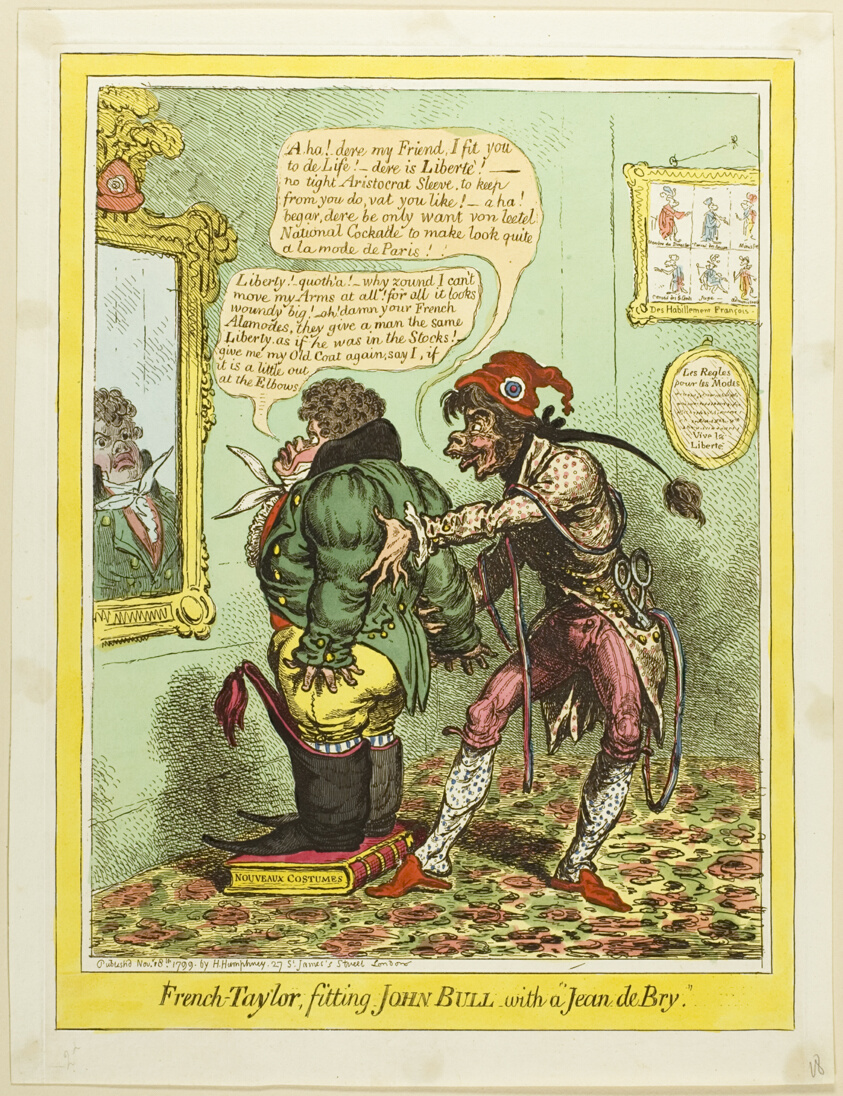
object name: Print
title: French-Tailor, Fitting John Bull with a "Jean de Bry"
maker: James Gillray (English, 1756-1815); published by Hannah Humphrey (English, c. 1745-1818)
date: published November 8, 1799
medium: Hand-colored etching on paper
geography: England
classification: etching; print; prints and drawing